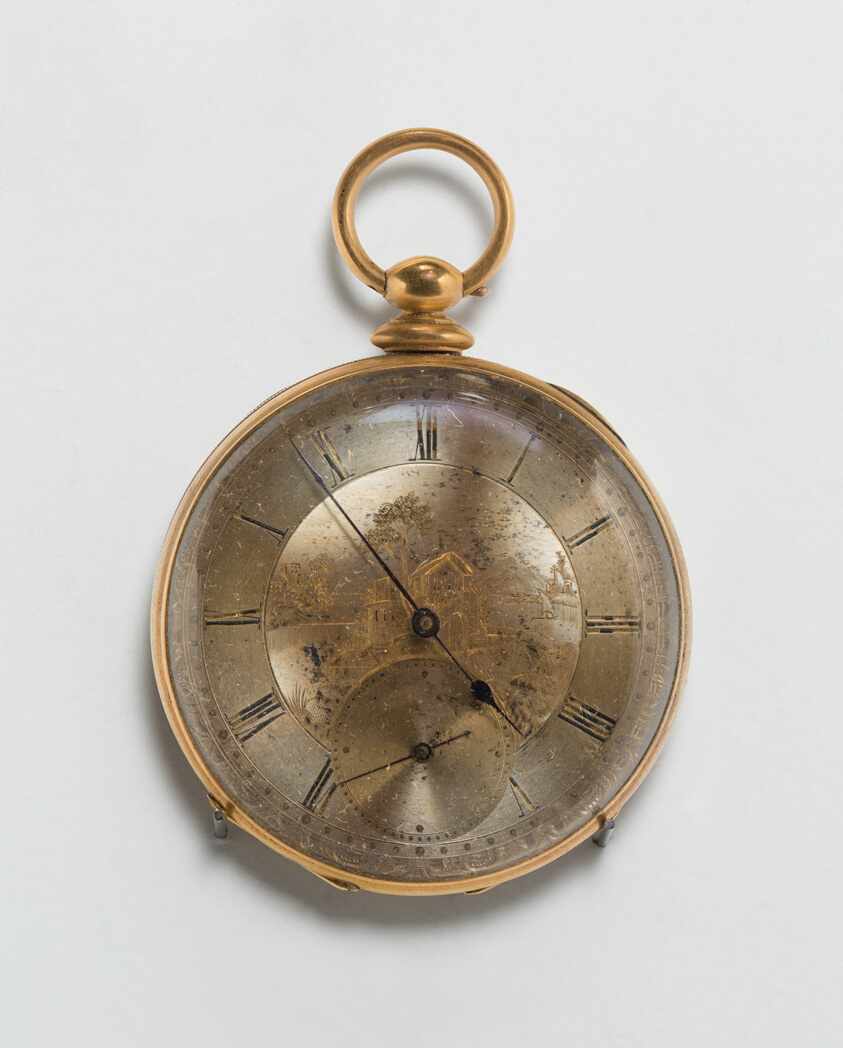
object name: Metalwork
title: Watch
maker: England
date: Mid 19th century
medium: Gold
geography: England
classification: watch; european decorative arts; metalwork